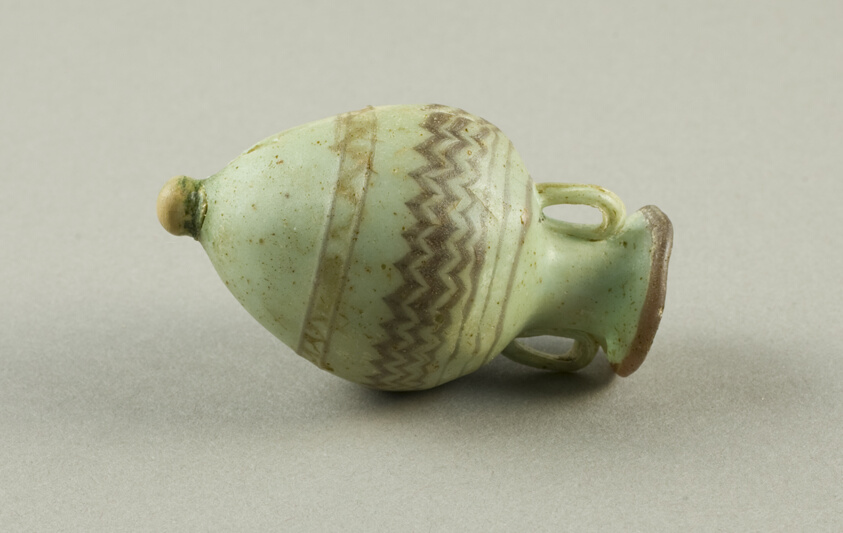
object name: Vessel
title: Amphora (Storage Jar)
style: late period (egyptian)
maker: Eastern Mediterranean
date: about 5th century BCE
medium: Glass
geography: Egypt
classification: glass; vessel; ancient art